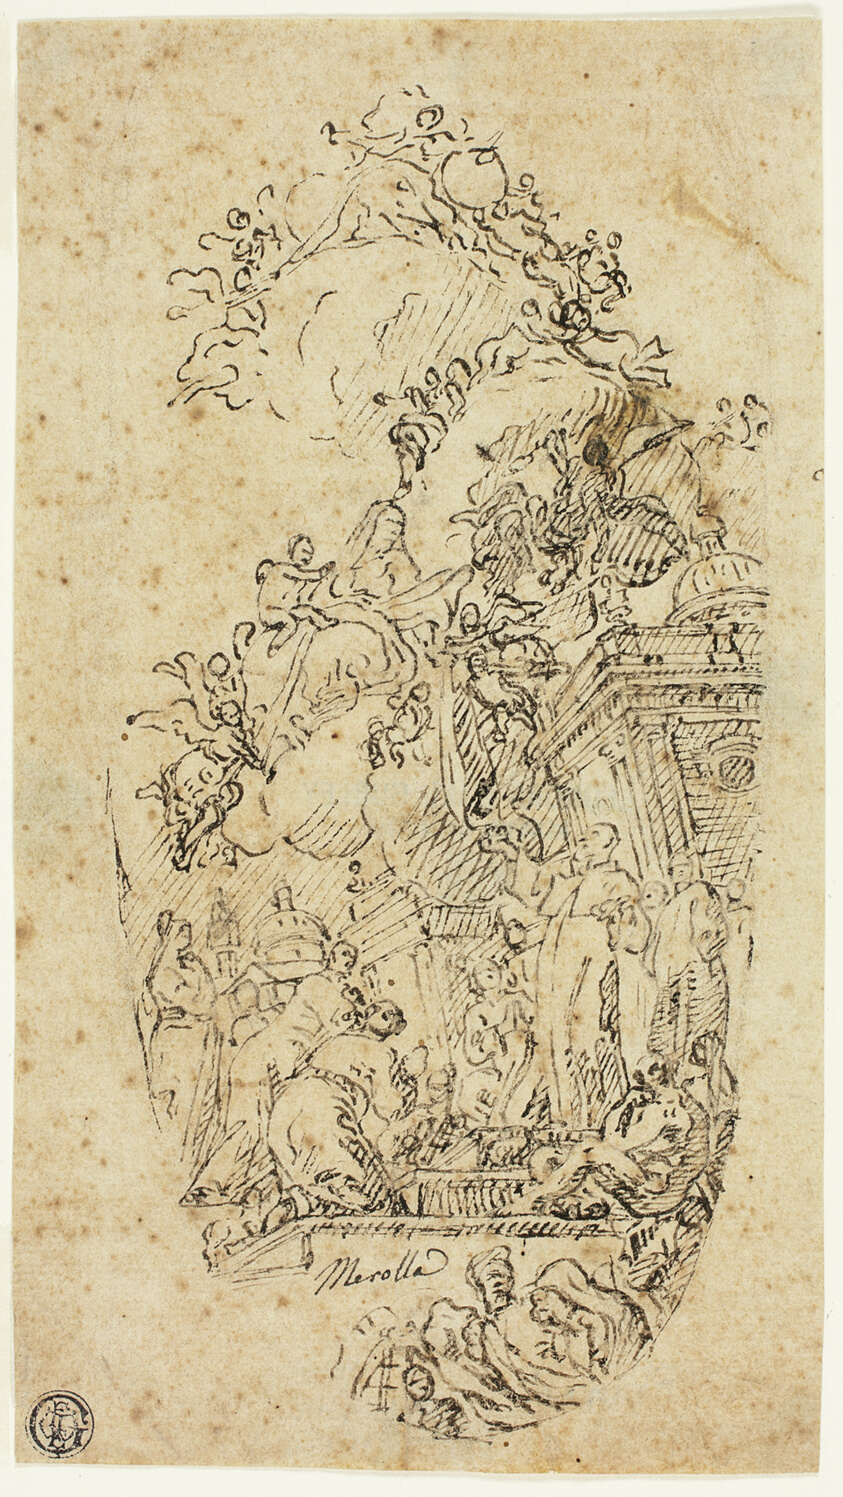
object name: Drawing and Watercolor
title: Saint Ildefonso Receiving a Chasuble from the Virgin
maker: Attributed to Marco Tullio Merolle; Italian, born 1730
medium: Pen and brown ink on tan laid paper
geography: Italy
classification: pen and ink drawings; drawings (visual works); prints and drawing